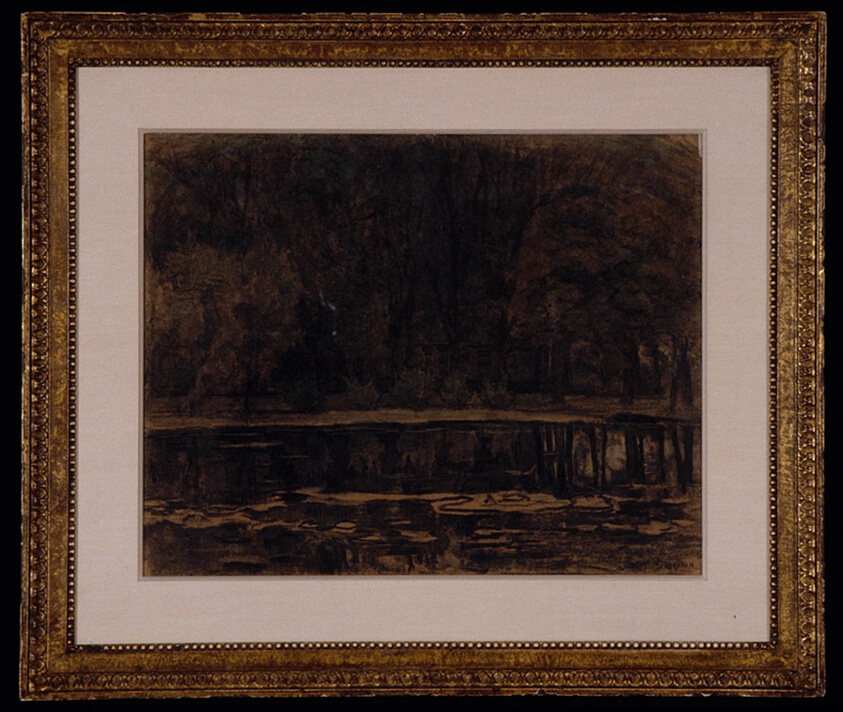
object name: Drawing and Watercolor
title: Geinrust Farm: Close Frontal View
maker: Piet Mondrian (Dutch, 1872-1944)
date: c. 1905–06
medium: Pastel and charcoal on buff wove paper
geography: Netherlands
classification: charcoal; drawings (visual works); prints and drawing